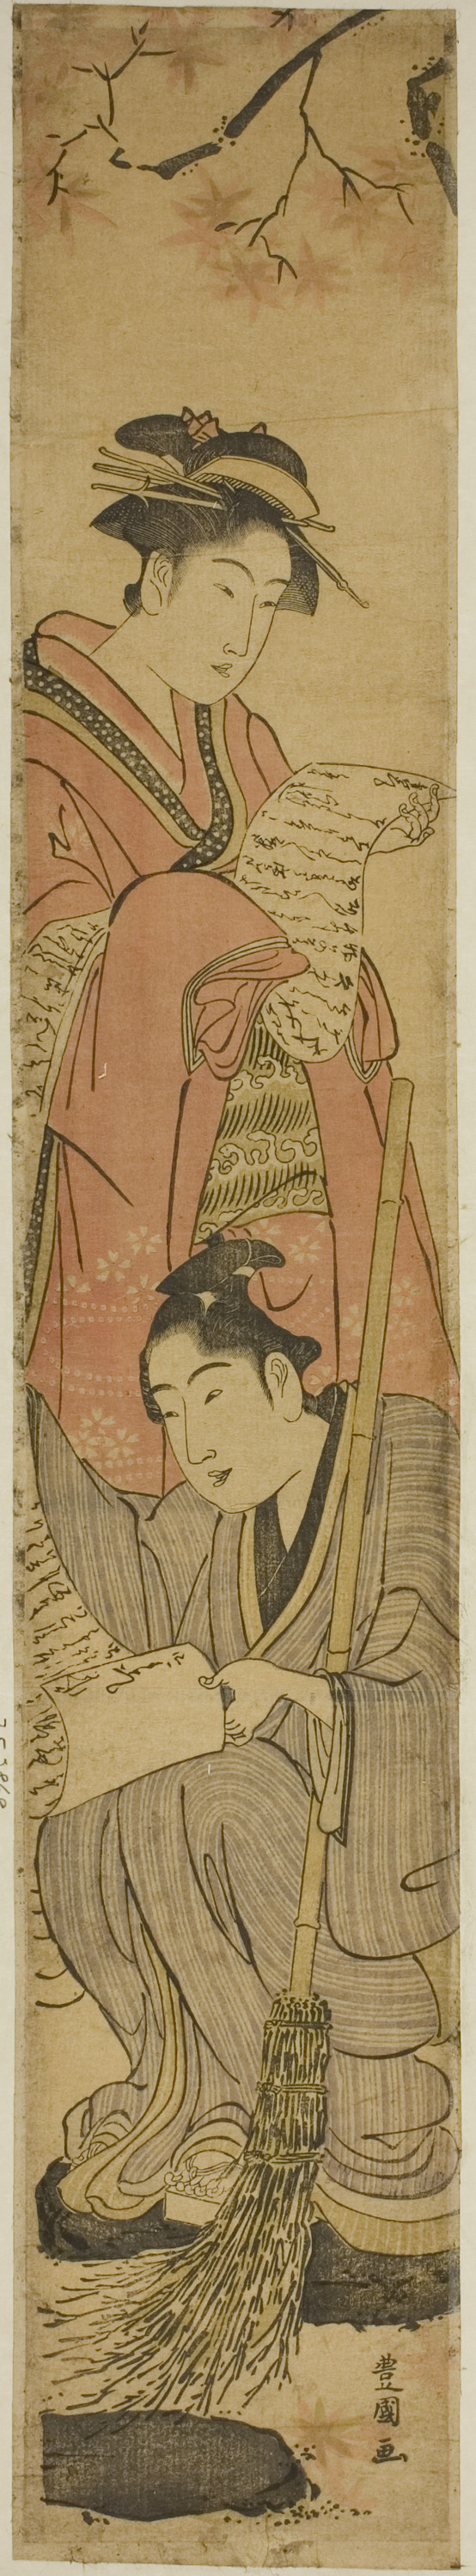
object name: Print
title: Young couple as Kanzan and Jittoku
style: Japanese (culture or style)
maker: Utagawa Toyokuni I 初代 歌川 豊国; Japanese, 1769–1825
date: early 19th century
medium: Color woodblock print; hashira-e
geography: Japan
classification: woodblock print; print; asian art